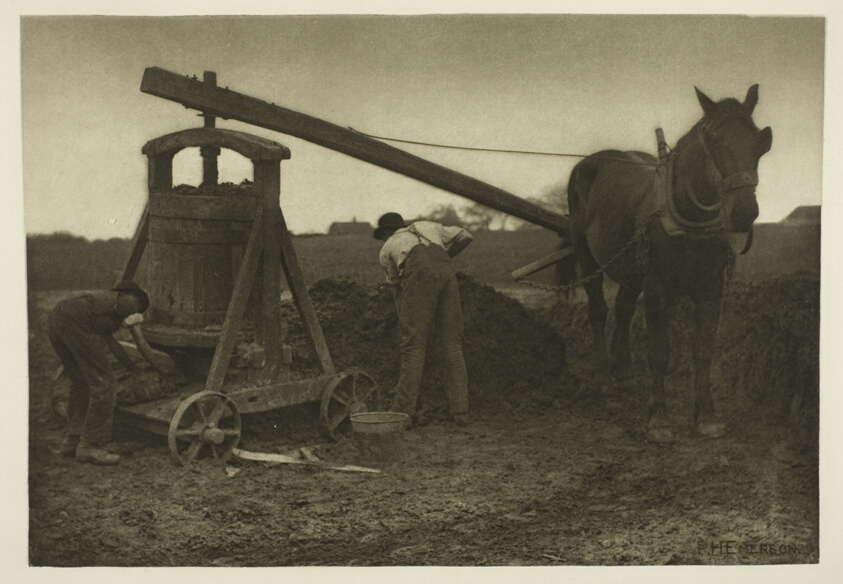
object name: Photograph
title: The Clay Mill (Norfolk)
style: 19th century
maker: Peter Henry Emerson (English, born Cuba, 1856–1936)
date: c. 1883/87, printed 1888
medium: Photogravure, pl. XXI from the album "Pictures of East Anglian Life" (1888)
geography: England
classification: photogravure; photomechanical process; photography; photograph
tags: Collected by Hugh Edwards, Pictures of East Anglian Life, Seat of War in the Crimea